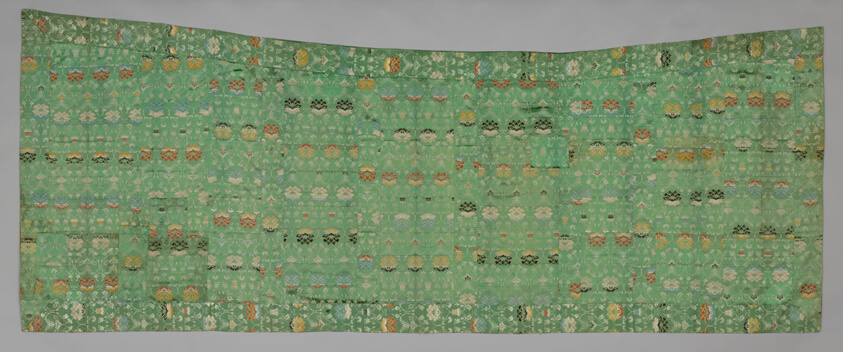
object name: Textile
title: Kesa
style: late edo, edo (japanese period)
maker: Japan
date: late Edo period (1789–1868), early 19th century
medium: Silk, warp-float faced 4:1 satin weave with weft-float faced 1:3 'S' twill interlacings of secondary binding warps and supplementary patterning wefts; lined with silk, plain weave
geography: Japan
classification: textile; liturgical - buddhist; weaving